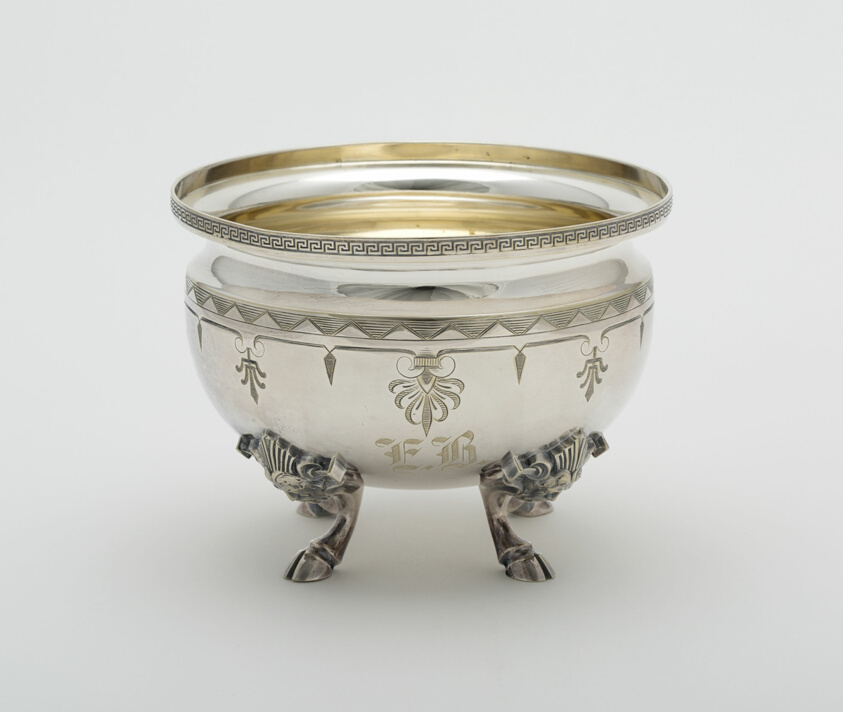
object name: Metalwork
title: Waste Bowl, part of Tea and Coffee Service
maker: Rogers, Smith, and Company (American, 1862–c. 1900); Meriden, Connecticut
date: 1878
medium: Silver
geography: Connecticut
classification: slop bowl; silver; american decorative arts; american arts; decorative arts